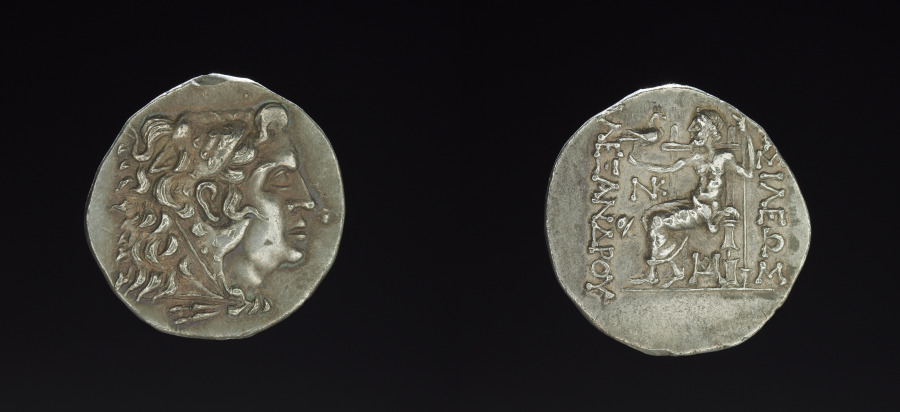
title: Indo-Greek Coin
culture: Afghanistan, Bactria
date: c. 200–1 BCE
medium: silver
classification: Silver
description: After Alexander of Macedon succeeded in conquering Egypt and Persia in 331 BC, his ambition to rule the known world led him further east across Bactria in Afghanistan, through the Hindu Kush mountain pass, and into India. There he succeeded in defeating all the local kings of the region until his men, on the brink of mutiny, insisted that they return to Greece. Alexander left governors in charge of his territories, and after his death in 323 BC, his governors became independent kings, establishing Hellenistic cities and a Greek cultural base in the region, which lasted for almost 200 years. The posthumous portrait of Alexander on the front of this coin depicts him wearing the lion scalp. He identified with Hercules, the mortal who became a god as a result of his superhuman feats, including the defeat of the Nemean lion.